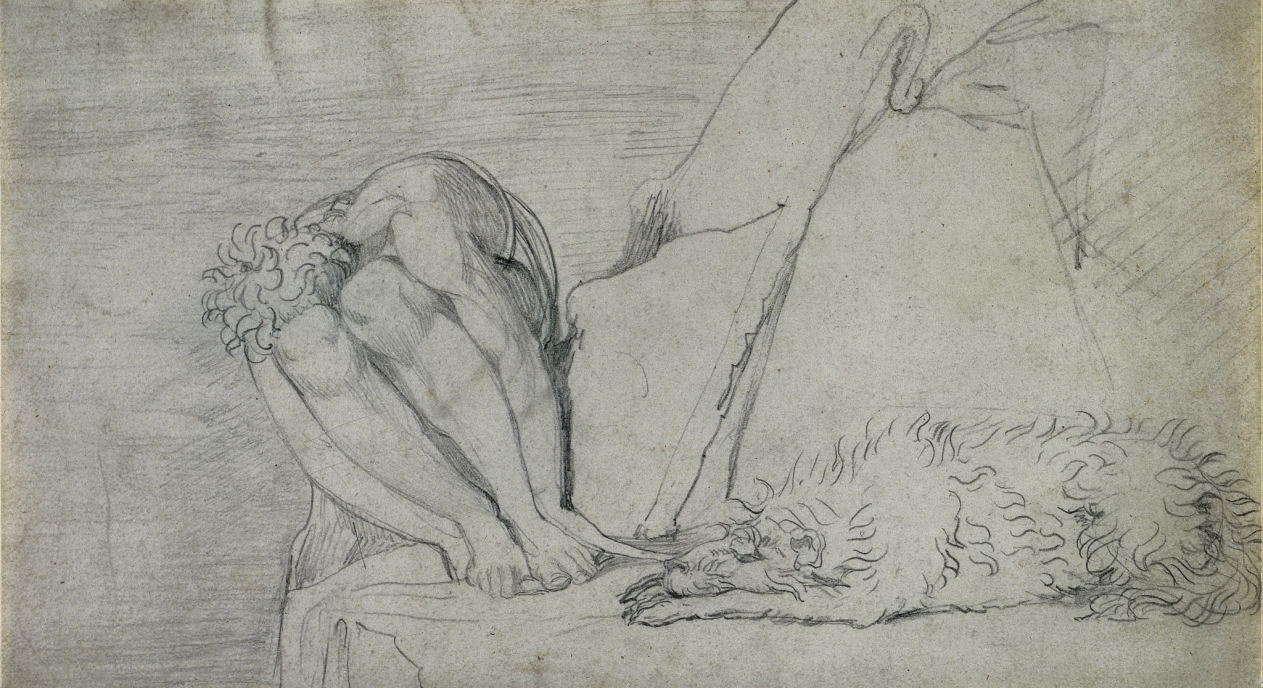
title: Sketch for "The Thought of Death alone, the Fear Destroys"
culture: England, 18th century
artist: William Blake (British, 1757–1827)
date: c. 1795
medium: graphite on paper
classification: Drawing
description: This sketch of a shepherd sleeping with his dog at the edge of a precipice relates to one of the nearly 550 watercolors that William Blake created for the 1797 edition of Edward Young’s The Complaint, and the Consolation; or, Night Thoughts, a long poem about death and salvation originally published in 1742–45. Blake worked extensively with books as an author and illustrator, and also engraved the work of others for publication. Night Thoughts was one of his most ambitious commercial projects. Unfortunately, only one of the four planned volumes was ever produced, since Richard Edwards, who had commissioned the work, closed his publishing business.